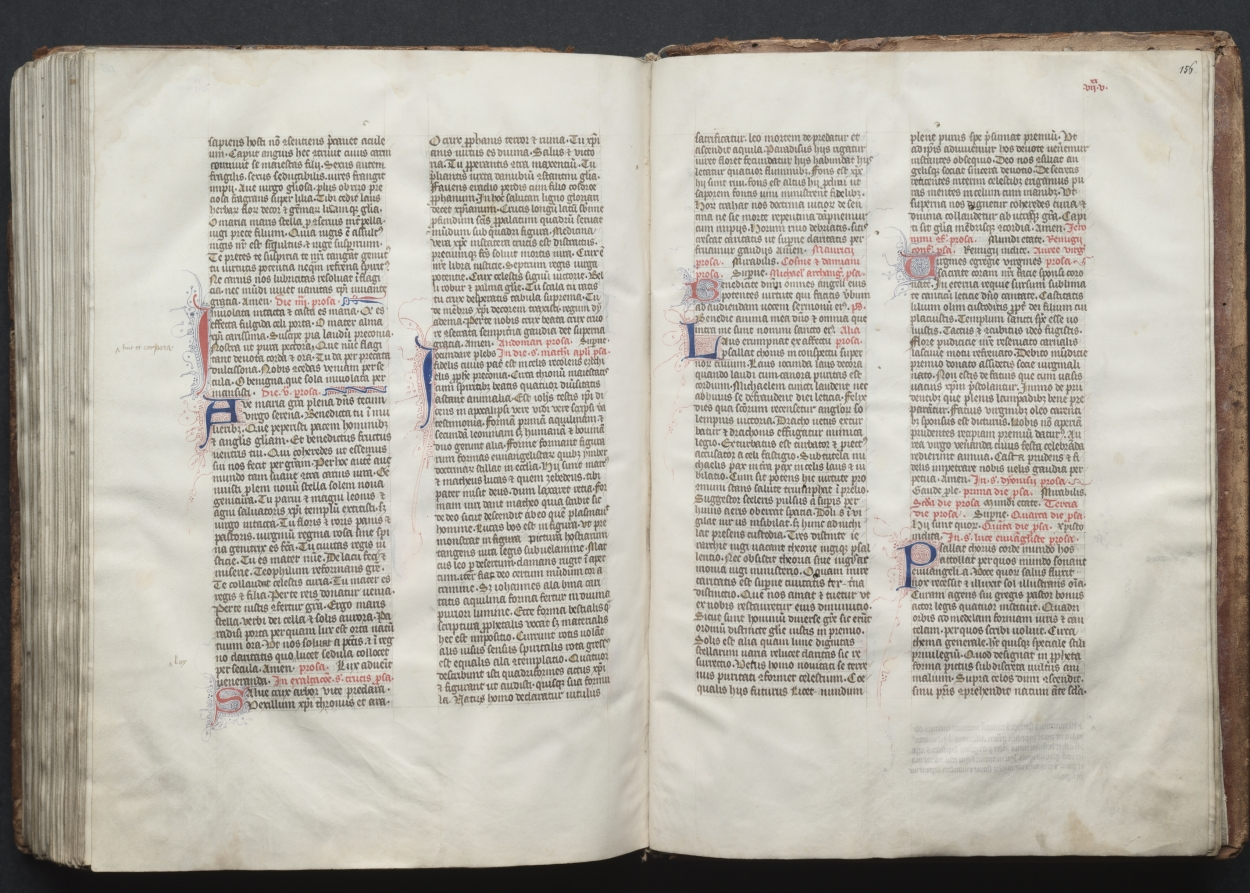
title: The Gotha Missal: Fol. 156r, Text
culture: France, Paris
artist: Master of the Boqueteaux (French)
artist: and Workshop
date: c. 1375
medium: ink, tempera, and gold on vellum; blind-tooled leather binding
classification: Bound Volume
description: The style and quality of this manuscript's decoration is typical of deluxe Parisian books made for aristocratic or royal patrons. Most of the book's decoration appears to be the work of the Master of the Boqueteaux, an artist active at the court of King Charles V (died 1380). His style was apparently shared by a number of book illuminators working in and around Paris. It is very possible that the Gotha Missal belonged to Charles V, but is not provable because the manuscript has no royal portraits and lacks a colophon. Given the book's magnificent decoration, however, it would seem that it was produced for a Valois prince, if not for the king himself. The manuscript receives its name from the German dukes of Gotha, its later owners.